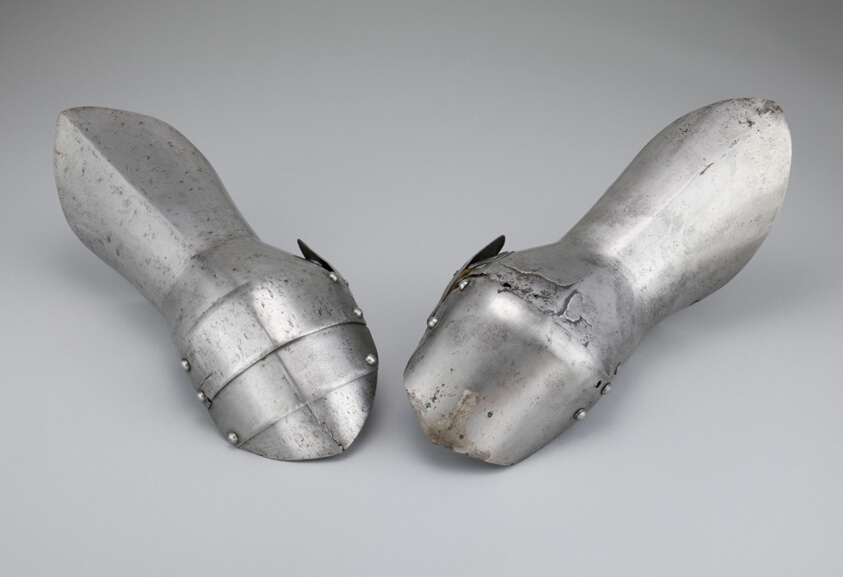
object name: Armor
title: Pair of Mitten Gauntlets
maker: Italian, possibly Spanish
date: c. 1480 and 19th century in 15th century style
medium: Steel and leather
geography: Italy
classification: suit-gauntlet; armor; arms and armor